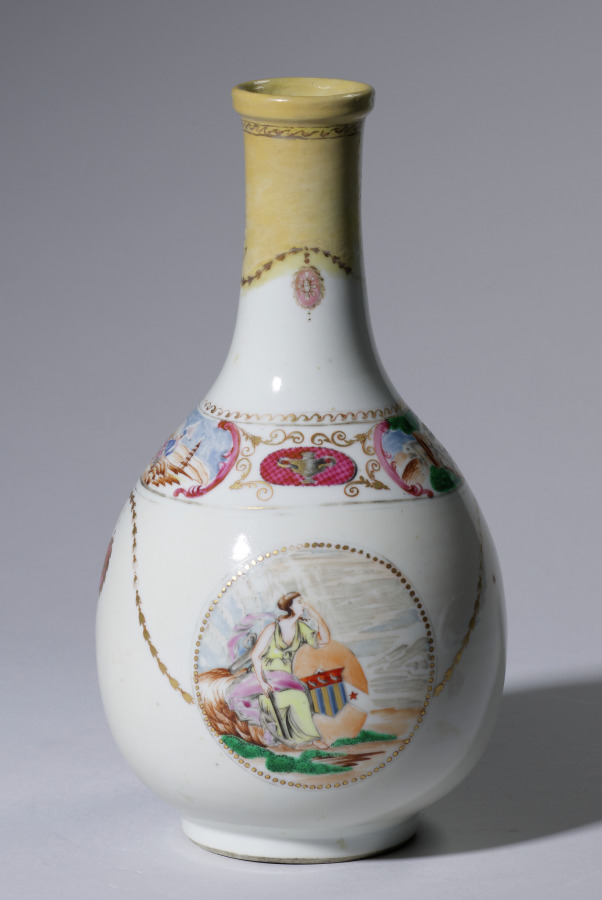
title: Bottle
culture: China, Chinese Export, early 19th century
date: c. 1800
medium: porcelain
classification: Ceramic